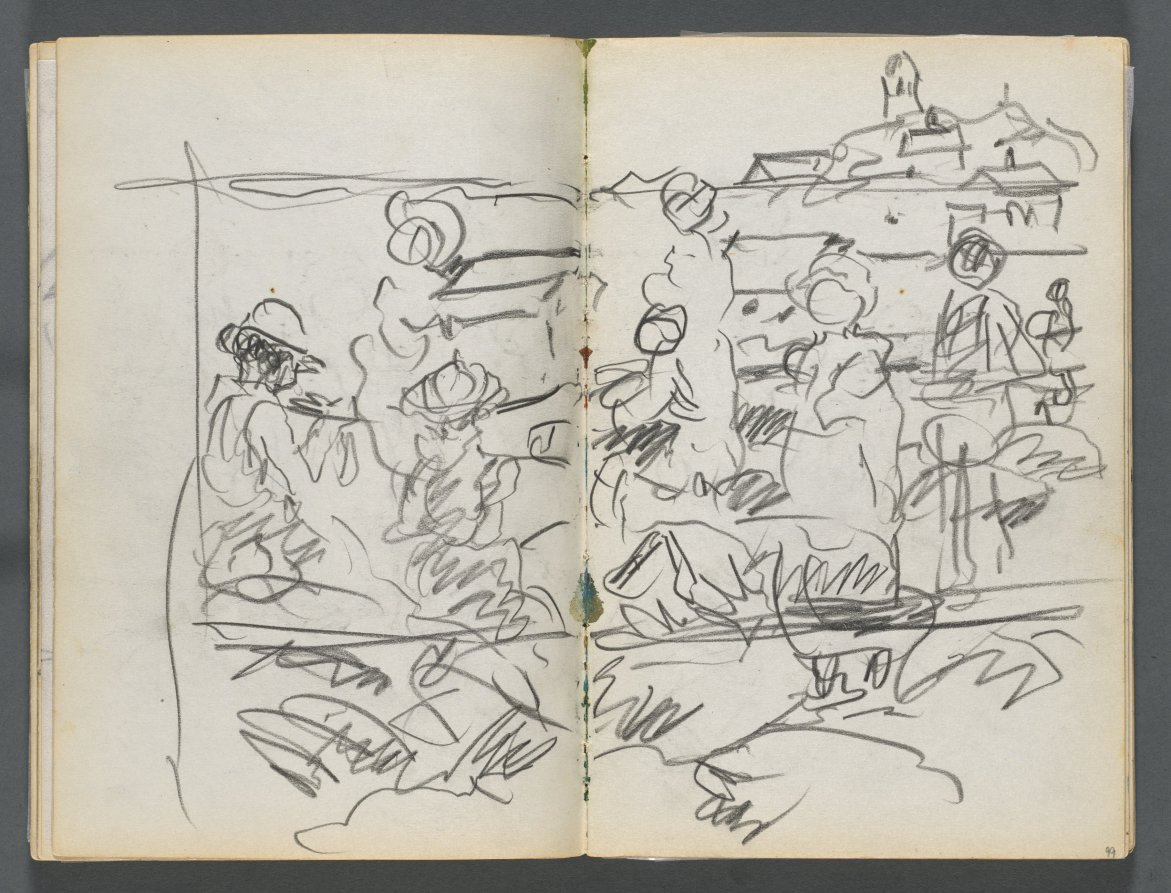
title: Sketchbook, The Dells, N° 127, page 098 & 99: Figures in a Landscape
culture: America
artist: Maurice Prendergast (American, born Newfoundland [now Canada], 1858–1924)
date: c. 1919–1921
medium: graphite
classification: Bound Volume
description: This sketchbook contains 59 pages of graphite drawings and 16 watercolors made at various locations on Cape Ann, Massachusetts.